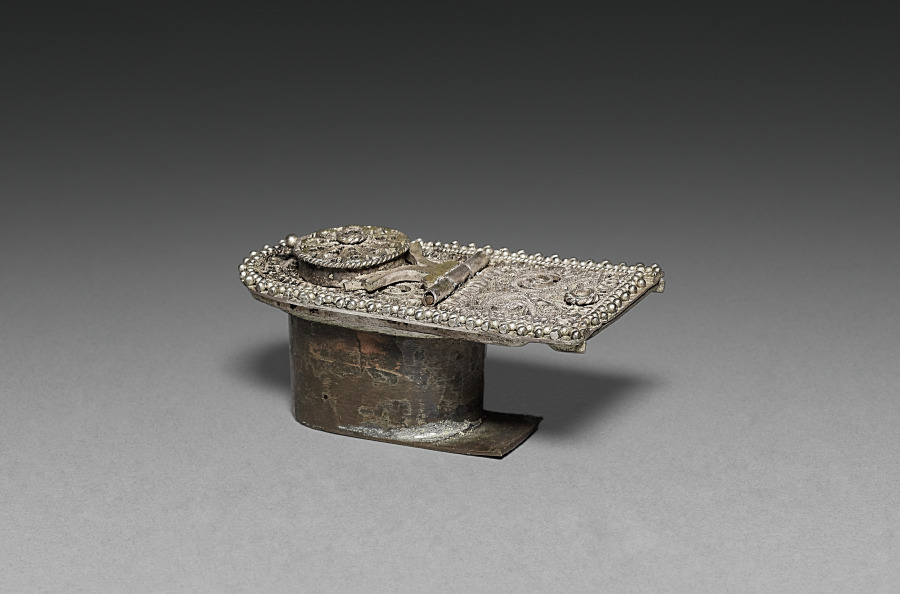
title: Pen and Ink Box (inkwell)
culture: Iran, Qajar period (1779-1925)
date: 1800s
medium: silver filigree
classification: Metalwork